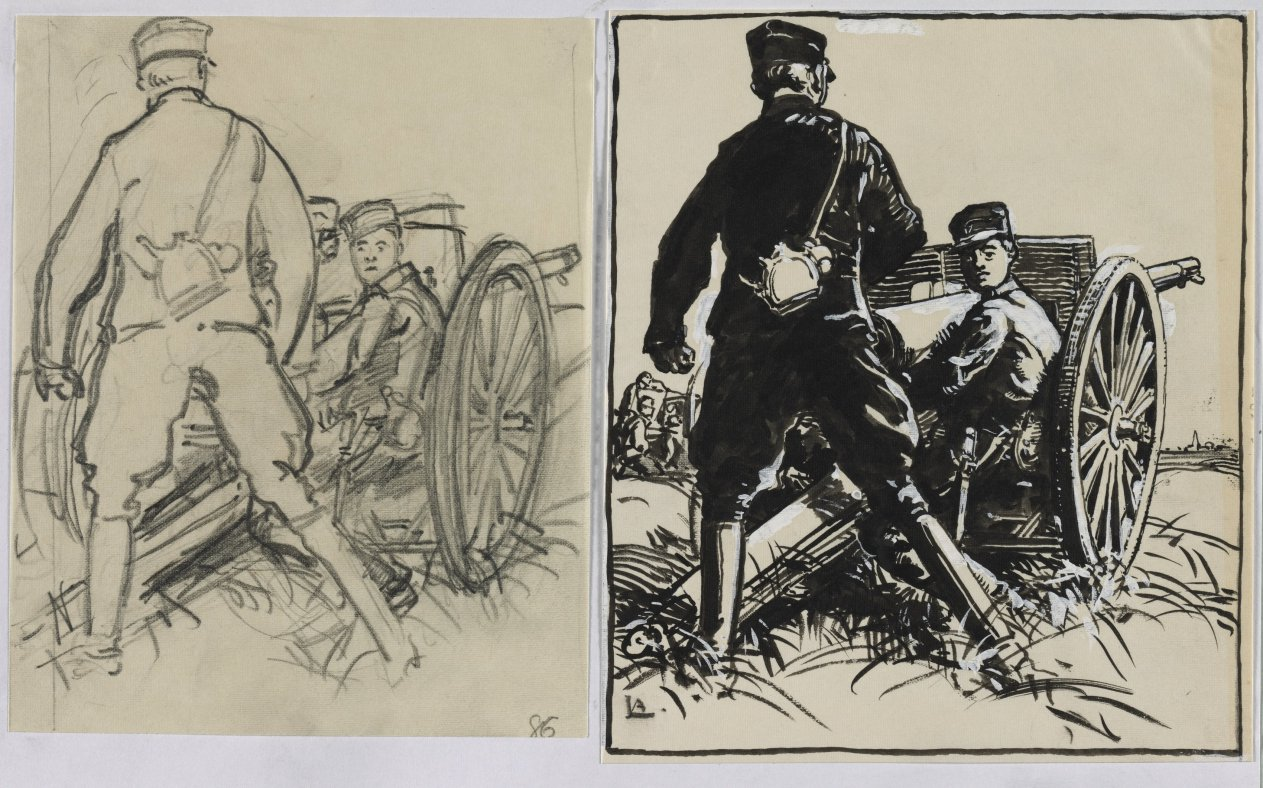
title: Artillelurs belges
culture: France, 20th century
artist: Auguste Louis Lepère (French, 1849–1918)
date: 1914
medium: brush and black ink, black crayon, heightened with white gouache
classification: Drawing